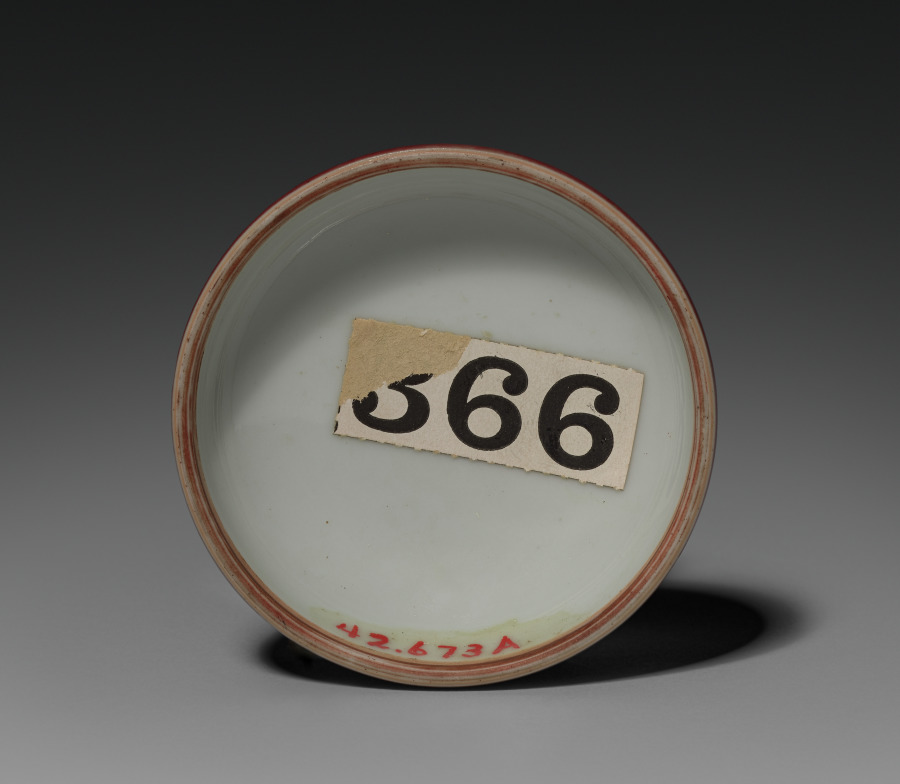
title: Seal Color Box (lid)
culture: China, Jiangxi province, Jingdezhen, Qing dynasty (1644-1911), Kangxi period (1662-1722)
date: 1662–1722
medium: porcelain with "peach bloom" glaze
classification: Ceramic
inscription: 大清康熙年制